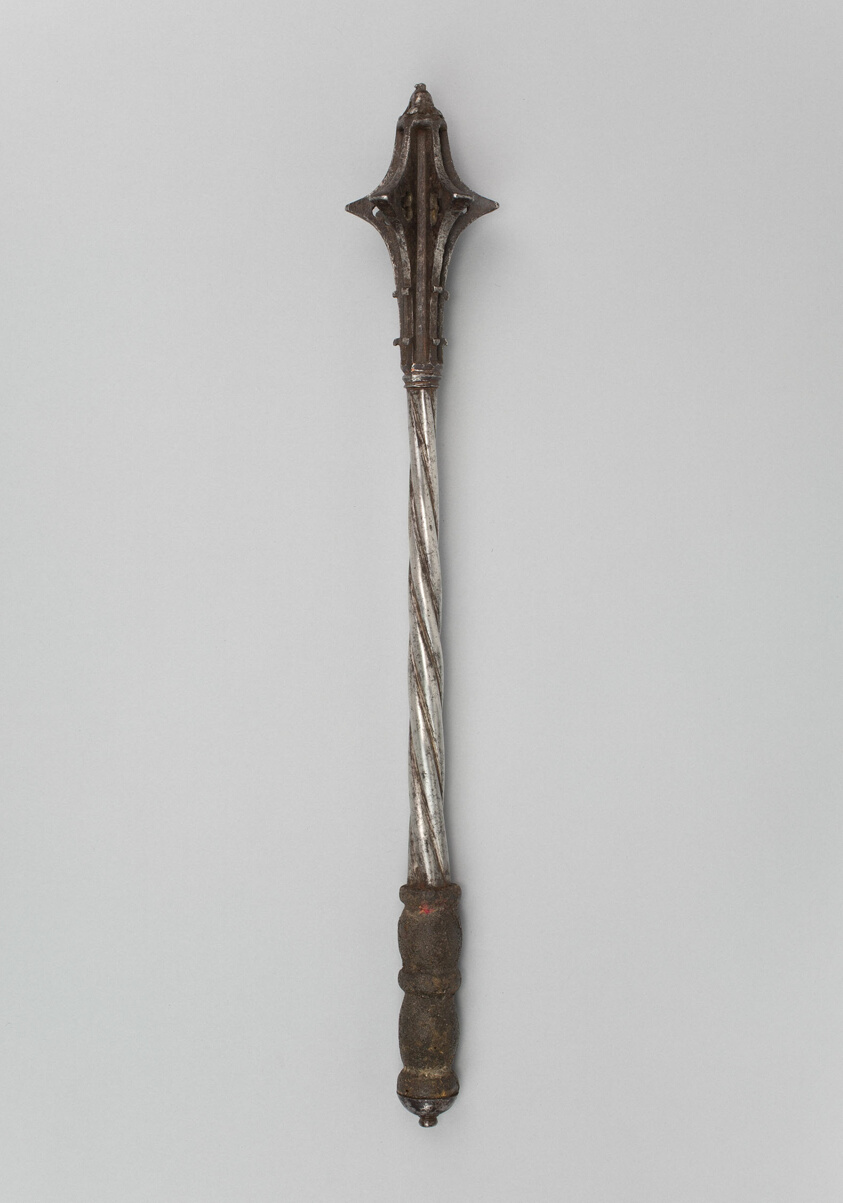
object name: Arms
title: Mace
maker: German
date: 1480/1500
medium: Steeel, iron, wood, and fish skin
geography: Germany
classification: shafted weapon; arms; arms and armor